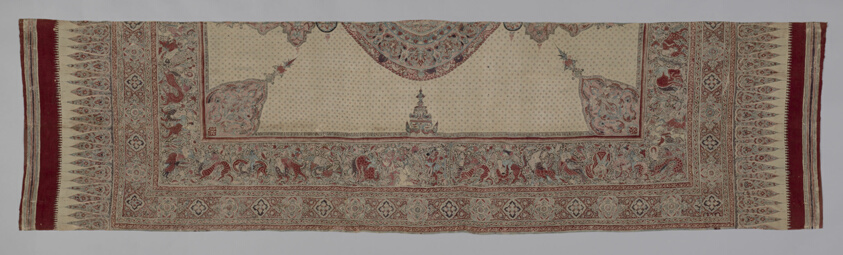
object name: Textile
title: Painted cotton with medallion and figures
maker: Deccan, India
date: 15th century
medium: cotton, plain weave; painted mordant; resist-dyed; painted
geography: India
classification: textile; weaving - printed